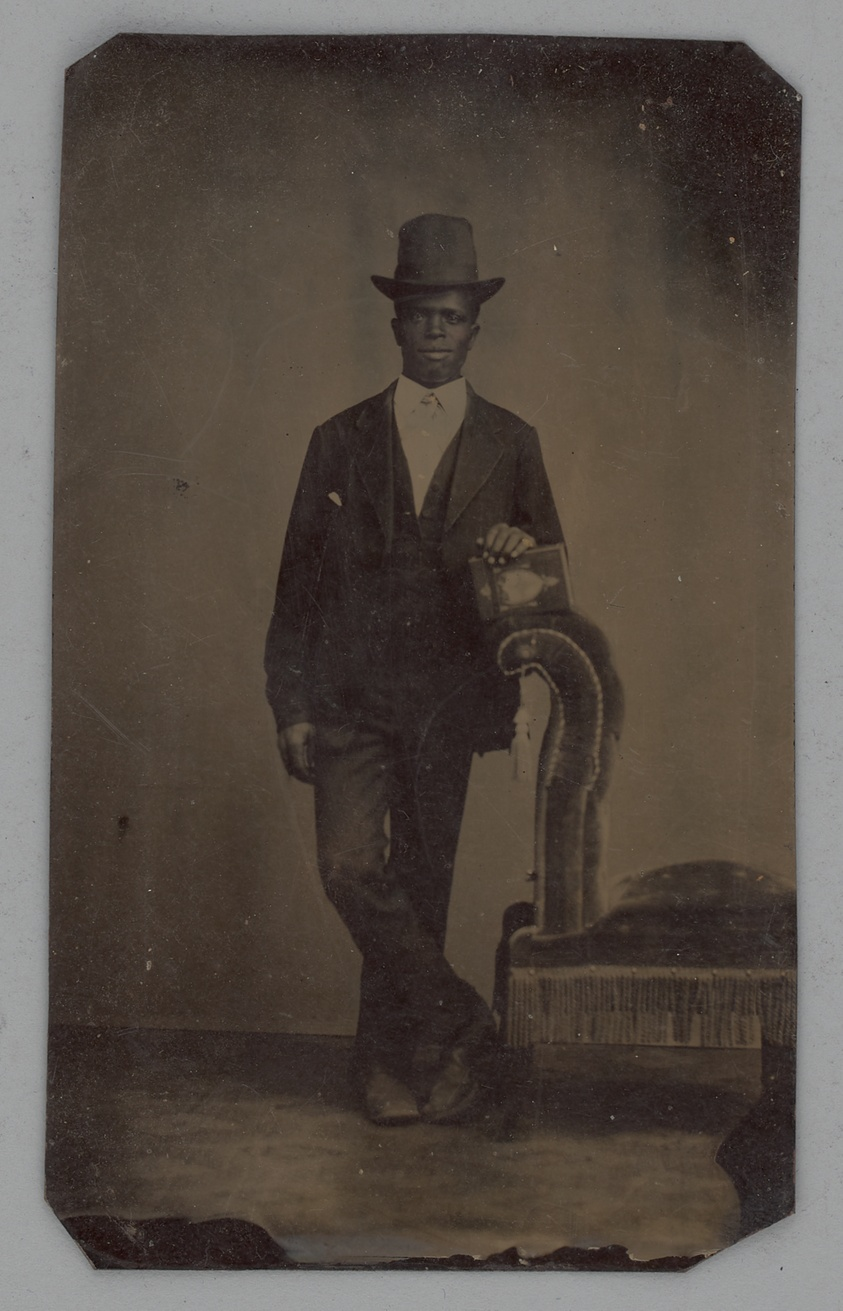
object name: Photograph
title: Untitled (Portrait of a Standing Man)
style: 19th century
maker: Unknown maker; American, 19th century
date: 1875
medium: Tintype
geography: United States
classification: portrait; tintype; photograph; photographic process; photography; portrait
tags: portraits: African American subject, lundberg collection, African American, portraits, portrait